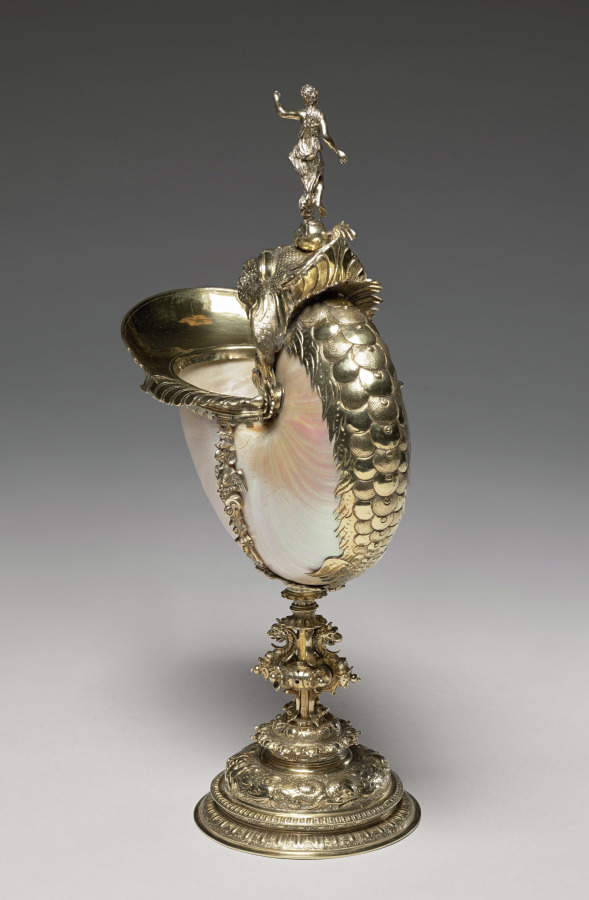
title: Nautilus Cup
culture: Netherlands, Holland, Delft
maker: Cornelis Jansz van der Burch (Dutch, active in Delft, d. 1615)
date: 1607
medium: Silver-gilt, nautilus shell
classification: Metalwork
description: Nautilus shells were brought to the Netherlands from Indonesia. Skilled Dutch silversmiths mounted them in silver, creating luxurious vessels that were sought after by wealthy collectors. Early Dutch nautilus cups are mainly associated with the city of Delft, although only a few other examples made in Delft are known from the late sixteenth and early seventeenth centuries. They feature the dramatic motif of a sea monster’s head.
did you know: The nautilus is a marine mollusk that swims by expelling water from its shell using jet propulsion.